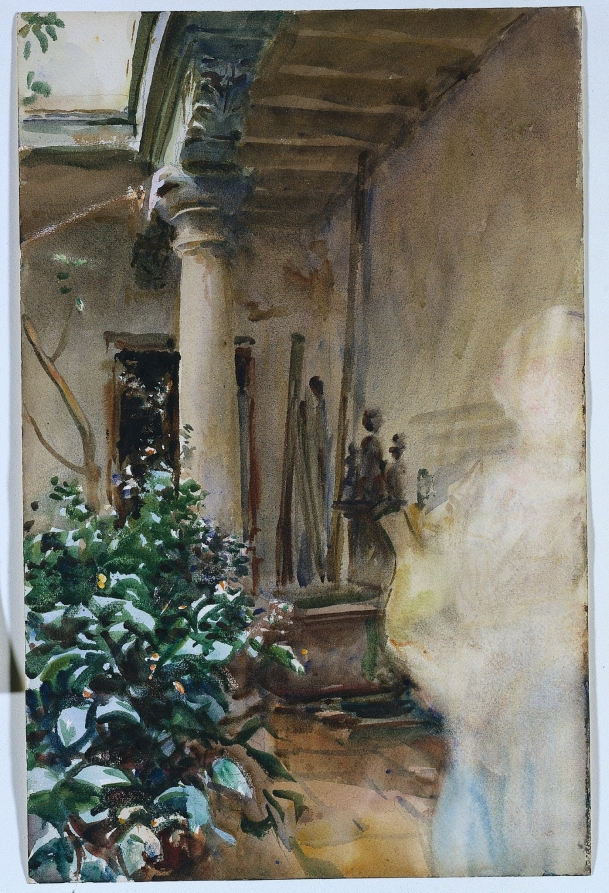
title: The Patio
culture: America, late 19th-early 20th Century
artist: John Singer Sargent (American, born Italy, 1856–1925)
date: 1908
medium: watercolor with traces of gouache over graphite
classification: Drawing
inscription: VERSO, center, in orange crayon: 5/3 ; lower left, in black chalk: 4072 [circled, sideways]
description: Sargent was born in Italy, studied in France, and worked chiefly in England, but he never renounced his American citizenship. As a young man, Sargent achieved fame and wealth as a portraitist, but he gradually tired of painting wealthy, superficial aristocrats. In his later years he focused increasingly on watercolor. Along with Winslow Homer, Sargent was the major artist to develop a spontaneous approach toward watercolor. Rather than carefully layering his pigments, he dashed off his paintings in a single sitting, allowing the colors to freely blend together.